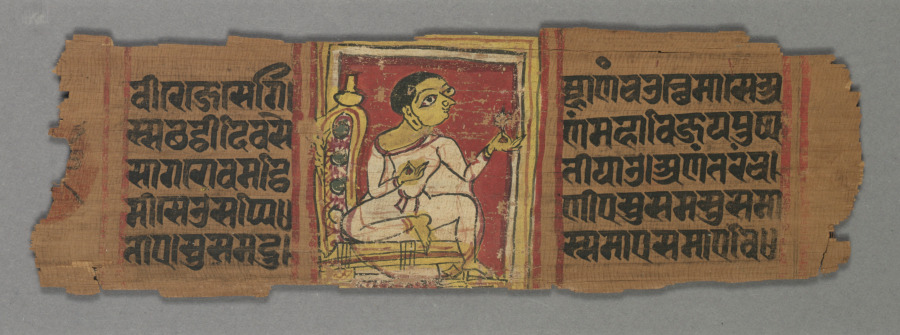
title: Monk Holding a Flower: Folio 2 (recto), from a Kalpa-sutra and Story of Kalakacharya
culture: Western India, Gujarat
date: 1287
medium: gum tempera and ink on palm leaf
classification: Painting